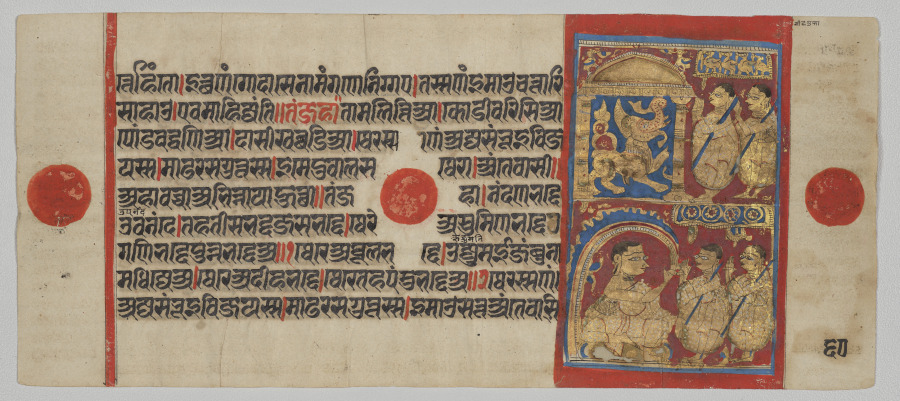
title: The Lion's Cave with Sthulabhadra and His Sisters, Folio 60 (verso), from a Kalpa-sutra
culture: Western India, Gujarat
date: c. 1450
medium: Gum tempera, ink, and gold on paper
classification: Painting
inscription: [[beginning with line 1]] ttehiṁto | ittha ṇaṁ godāse nāmaṁ gaṇe niggae | tassa ṇaṁ imāu cattāri [line 2] sāhāu | evam=āhijjaṁti || taṁ jahā Tāmalittiā | Koḍīvarisiā [line 3] Poṁḍavaddhaṇiā | Dāsīkhabbaḍiā | therassa| |ṇaṁ ajja-Saṁbhūivija- [line 4] yassa | māḍhara-saguttassa | ime ḍuvālasa therā | aṁtevāsī || [line 5] ahāvaccā abhinnāyā hutthā || taṁ jahā | Naṁdaṇabhadde [line 6] Uvanaṁde [note 1] | taha Tīsabhadda Jasabhadde | there a Sumiṇabhadde 7? [line 7] Gaṇibhadde Punnabhadde a || 1 there a Thūlabhadde | Ujjumaī [note 2] Jaṁbu nā- [line 8] madhijje a | there a Dīhabhadde | there taha Paṁḍubhadde a || 2 therassa ṇaṁ | [line 9] ajja-Saṁbhūivijayassa | māḍhara-saguttassa | imāu satta aṁtevāsi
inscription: [[upper right]] sīha guphā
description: This manuscript is open to a page with a painting that depicts the story of a Jain monk who transformed himself into a composite beast when his sisters, two nuns, came to visit him. Terrified, the nuns ran to a senior monk, at the lower left, who admonished their brother for his overly prideful display of power. Remarkably, this story is not told in the text itself, which contains only their names among a list of prominent Jain teachers. The painting would remind a reader of the story that is found in many commentaries to the text.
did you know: The three red dots in the margins and the center occur only on the reverse side of the page; the obverse side has only one red dot in the center.